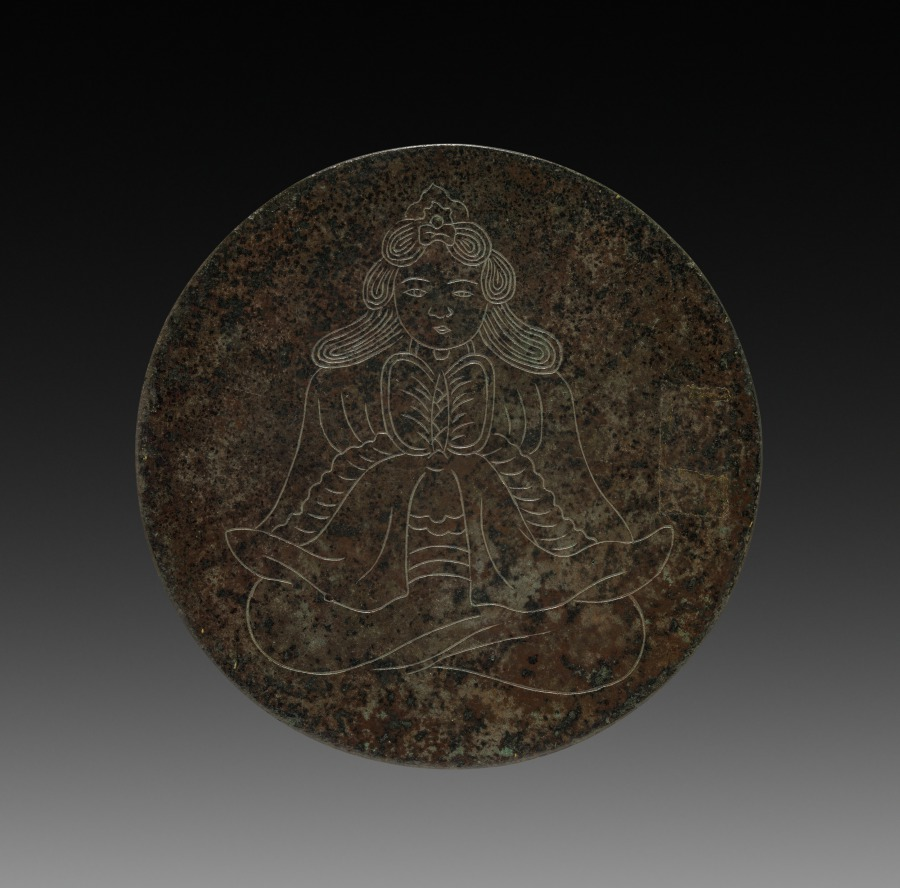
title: Mirror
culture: Japan, Kamakura period (1185–1333)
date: 1185–1333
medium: bronze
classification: Metalwork